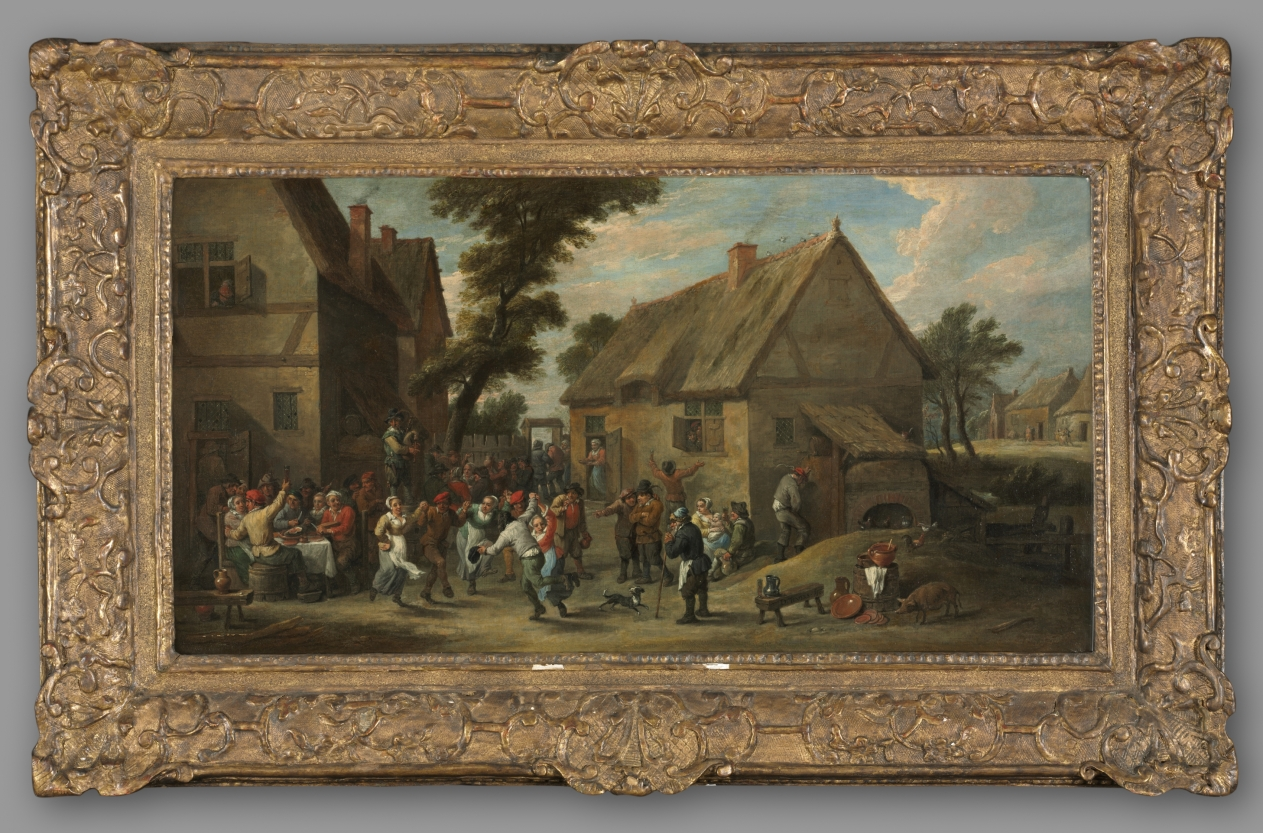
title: Village Festival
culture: Flanders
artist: David Teniers (Flemish, 1610–1690)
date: c. 1646–50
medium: oil on canvas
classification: Painting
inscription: Signed lower right: "D. TENIERS. FEC."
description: Depictions of peasant festivals, such as weddings, harvests, and village holidays became an extremely popular subject for Flemish artists during the 1600s. In his paintings of these festive occasions David Teniers the Younger (1610–1690), portrayed peasants dancing and playing music, focusing on the cheerful elements of peasant life. His images often feature close-knit family groups taking part in the celebration. Contrary to his predecessors, who often depicted broken and disorderly still life objects in their paintings, Teniers emphasized household objects in brass, ceramic, and glass in a perfect state to demonstrate the growing prosperity of the peasants.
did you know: Surviving drawings show that Teniers sketched many peasants from life, and similar figures appear throughout his peasant paintings from about 1640 to 1660.